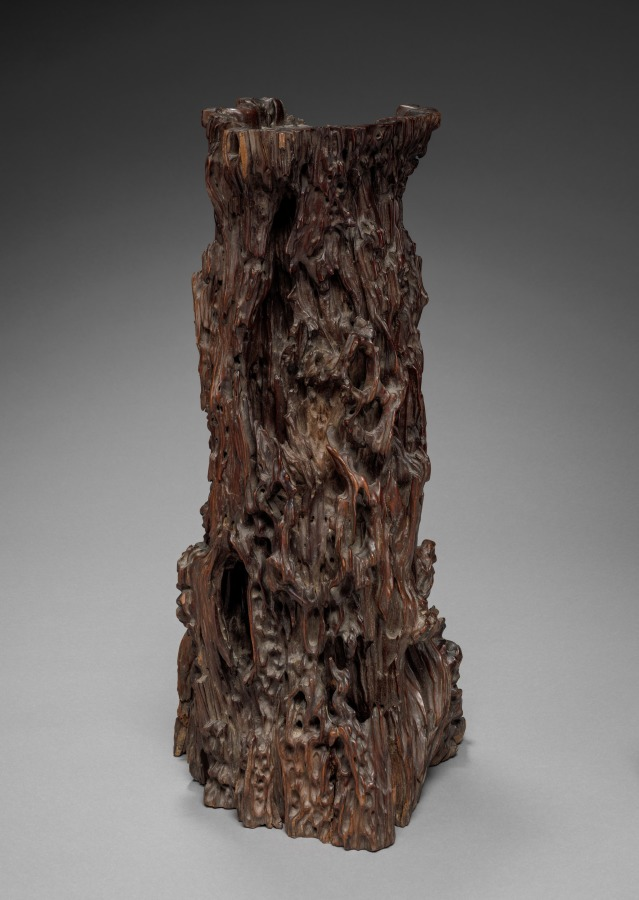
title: Prunus Wood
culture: China, Qing dynasty (1644-1911)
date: 1700–1899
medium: wood carving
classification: Wood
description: The gnarled and twisted form of a prunus stump is carved to accentuate its naturally textured surface. The body is finely polished to create a lustrous patina. Simple wood carvings like this exemplify the Chinese scholars’ taste for natural forms and rustic materials, which in turn reflect the desire to retreat into nature. They were collected and displayed as decorative works of art in the traditional scholars’ studios.